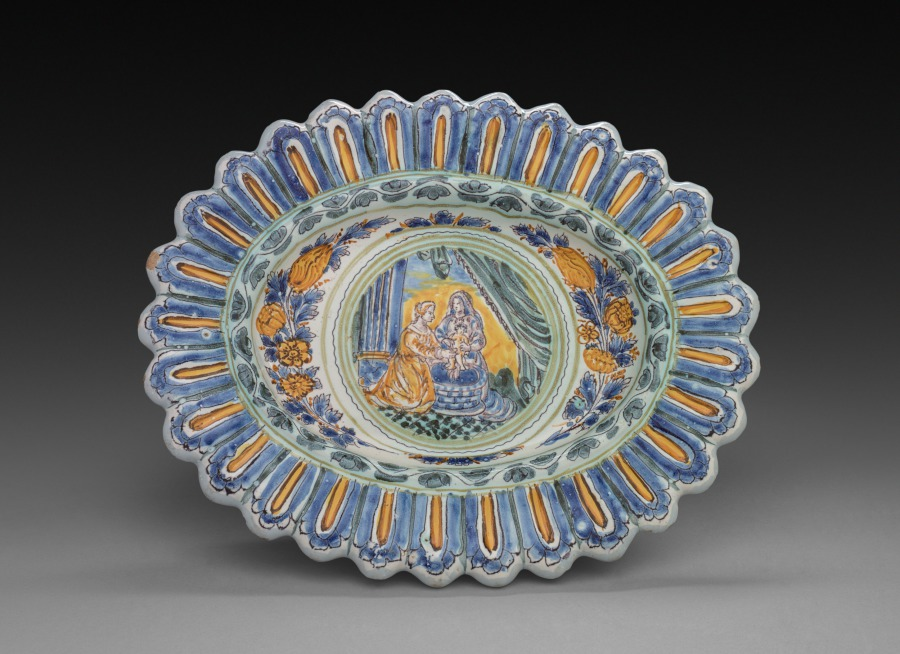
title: Platter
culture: France, 17th century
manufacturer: Nevers Factory (French)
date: c. 1650–1680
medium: faience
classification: Ceramic